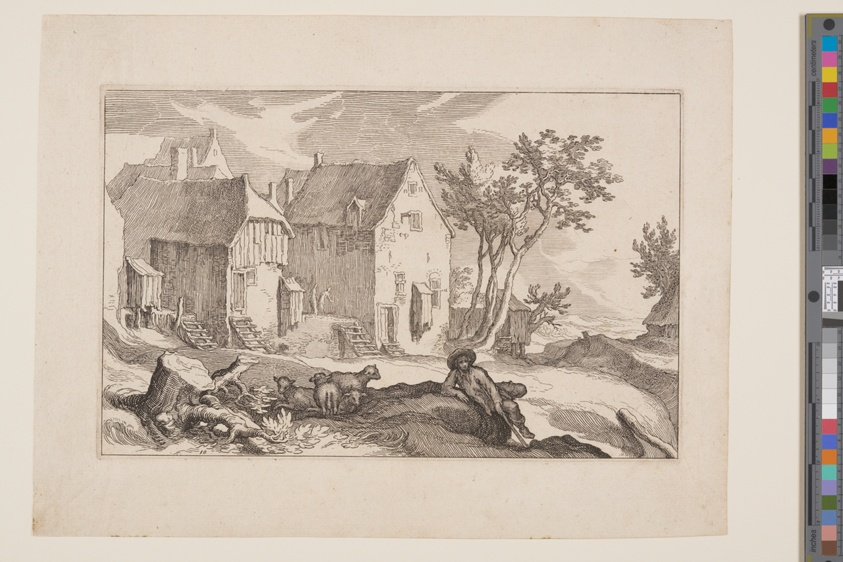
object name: Print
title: Plate 10, from Landscapes with Farmhouses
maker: Boëtius Adamsz. Bolswert (Flemish, 1580–1633); after Abraham Bloemaert (Dutch, 1566–1651)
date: 1614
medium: Etching on ivory laid paper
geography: Flanders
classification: print; paper; prints and drawing; etching